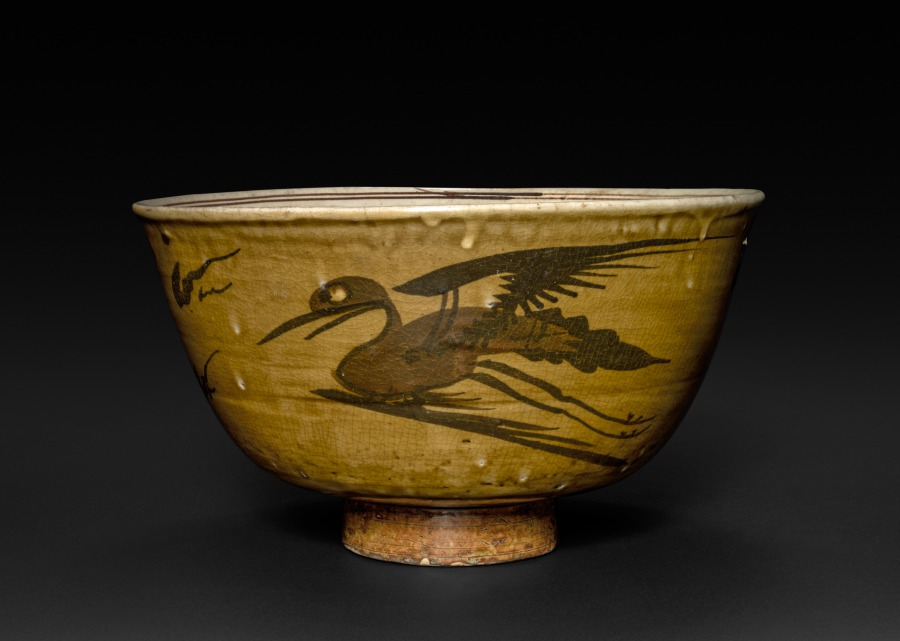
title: Bowl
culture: China, Ming dynasty (1368–1644)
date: 1368–1644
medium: stoneware, Cizhou ware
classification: Ceramic